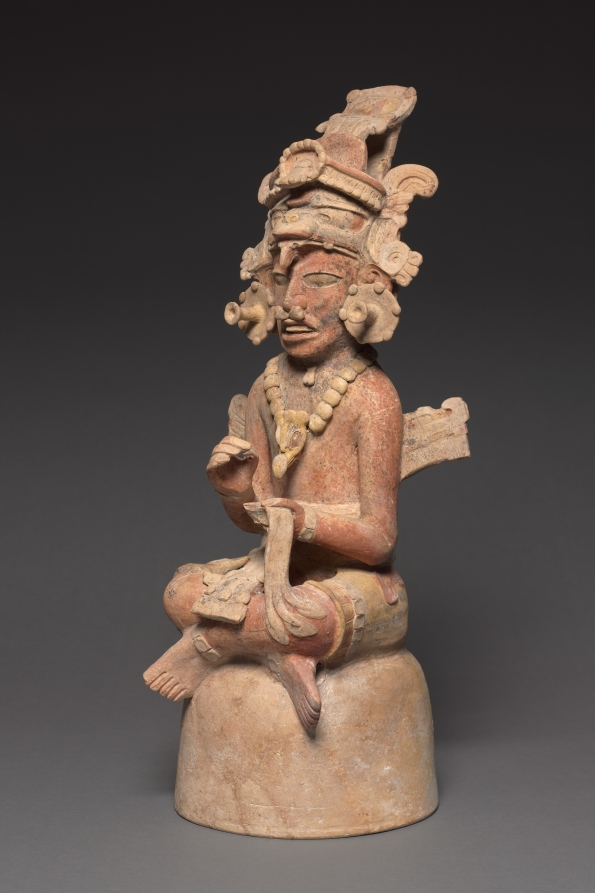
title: Artisan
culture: Guatemala, Petén region, Maya style (250-900), Maya style (250-900)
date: 250–600 CE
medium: earthenware with colored slips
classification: Sculpture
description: These figures represent the supernatural patrons of the visual arts and writing: the brothers Hun Batz and Hun Chuen ("One Monkey" and "One Artisan"). The two were refined artists but also bullies who tormented their younger brothers, who took revenge by transforming their elders into monkeys. Many Maya representations of the painter-scribes immortalize this fate by depicting the pair with both simian and human features, as here. The brothers are shown engaged in artistic or scribal pursuits. Sitting on high-domed bases that may have served as the lids of incense or offering bowls, each apparently once grasped a tool in his upper hand—for instance, a paint brush or a stylus for writing. In the lower hand, one cradles a small mask and the other, a piece of bark that likely refers to the beaten bark from which the Maya made books.